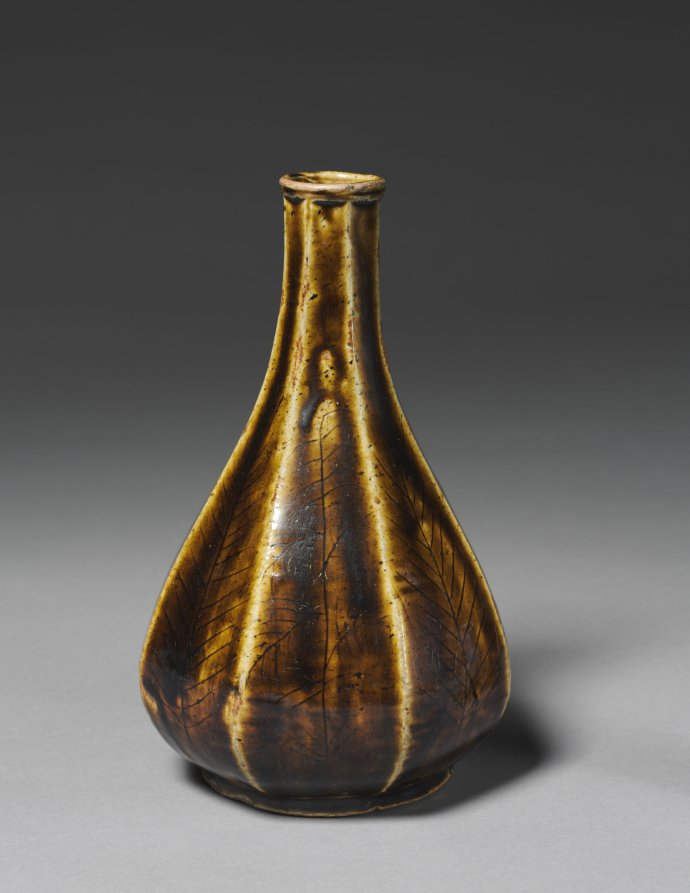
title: Eight-faceted Bottle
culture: Korea, Joseon dynasty (1392–1910)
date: 1800s-1900s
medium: stoneware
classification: Ceramic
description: Toward the end of the 1700s, multifaceted bottles like this one became popular with the growing demand from both the elites as well as the middle class. The dark-brown iron oxide pigment makes this eight-faceted bottle earthy, yet sophisticated.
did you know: The exquisite hue of this bottle is from iron oxide, also known as “purple oxide.”